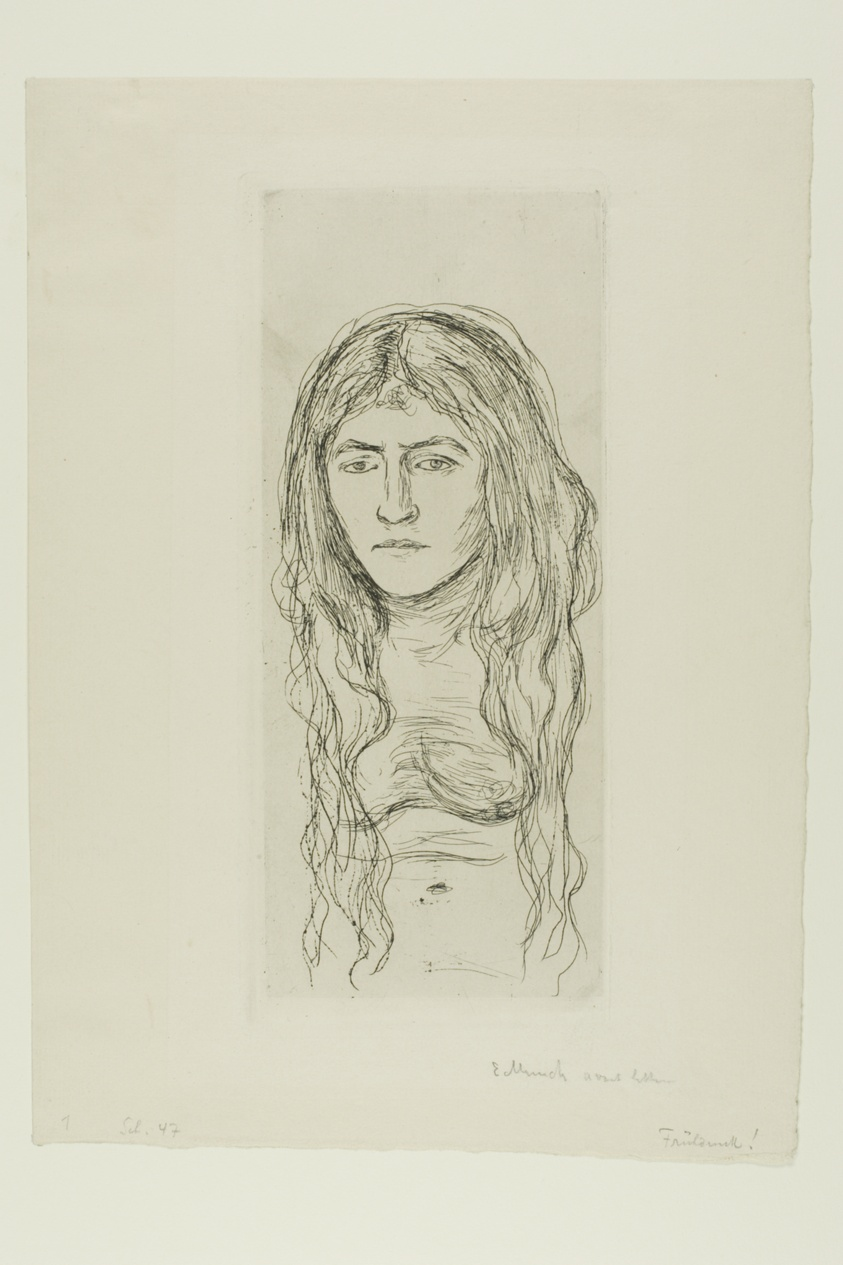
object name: Print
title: Woman with Long Hair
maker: Edvard Munch (Norwegian, 1863-1944)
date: 1896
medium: Etching on cream laid paper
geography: Norway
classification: etching; print; prints and drawing